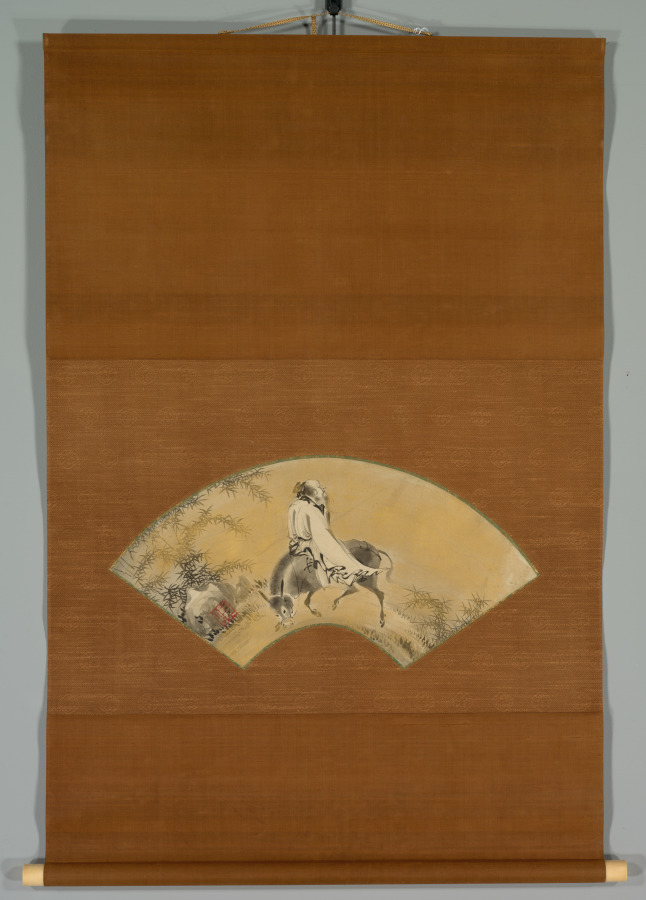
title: Pan Lang (Han Rō)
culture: Japan, Muromachi period (1392–1573)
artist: Shikibu Terutada (Japanese, active mid-1500s)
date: mid-1500s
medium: Fan-shaped painting mounted as hanging scroll; ink and gold on paper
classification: Painting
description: These three fan-shaped paintings, now mounted as individual hanging scrolls, were once part of a set of 20 mounted on a folding screen. They portray the Chinese subjects, from left to right, of the scholar-official Pan Lang, Hanshan reciting his poetry to Shide, and a duck in flight above reeds. Pan Lang grew so fond of the mountain in his place of exile that when he was ordered back to the capital, he rode backward on his donkey so he could see it until it receded into the distance. Hanshan and Shide worked in the kitchen of a Zen monastery, but were actually reincarnations of the bodhisattvas Manjushri and Samantabhadra. The combination of a mandarin duck and reeds may have signified a level of attainment in Chinese civil service exams. All three paintings bear the seal of the Kantobased artist Shikibu Terutada. Shikibu was familiar with Kano school painting, but he also modeled his early style after that of the prominent Kanto-based Kenkō Shōkei (active about 1470–after 1523).